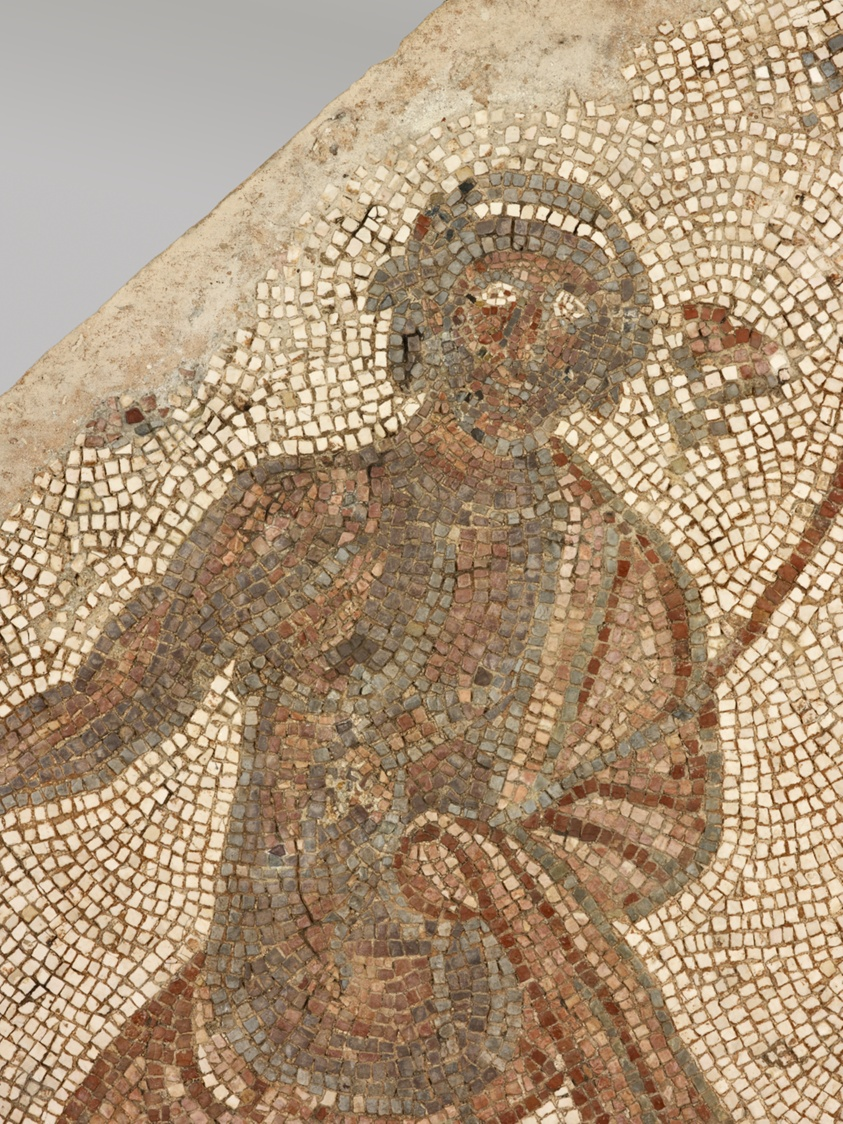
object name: Architectural fragment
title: Mosaic Fragment with Man Leading a Giraffe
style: byzantine, ancient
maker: Byzantine; Syria or Lebanon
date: 5th century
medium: Stone in mortar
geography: Tyre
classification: architectural fragment; mosaic; ancient art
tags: animals, men